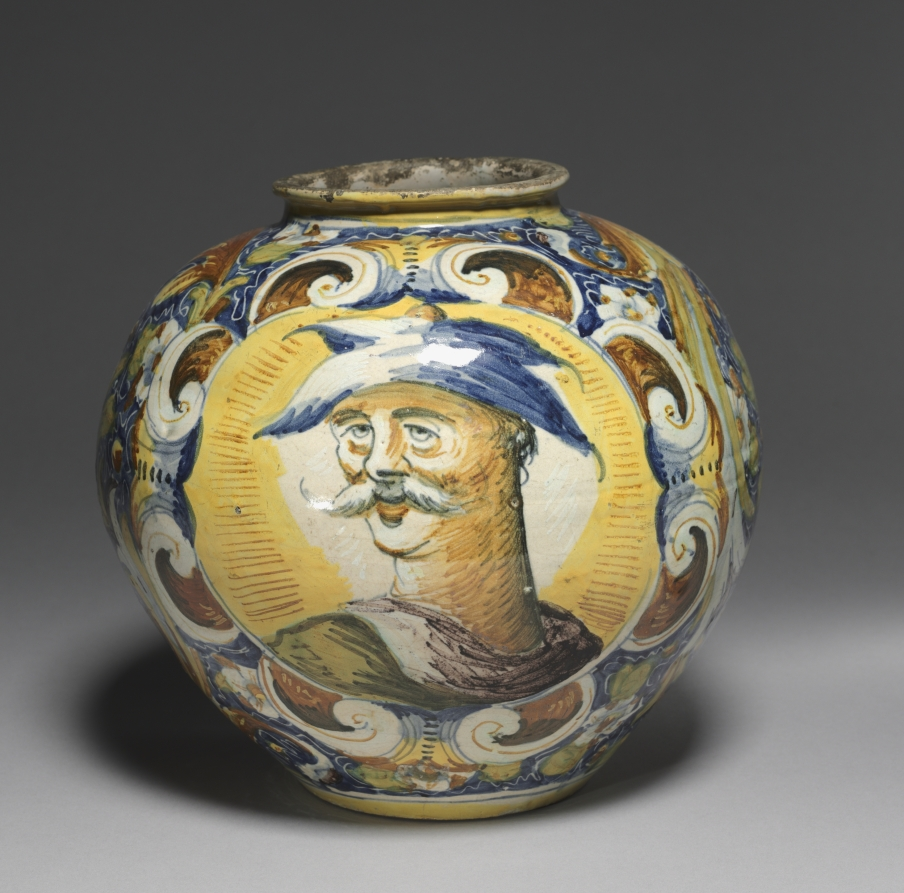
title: Storage Jar (Vaso a Palla)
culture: Italy, Venice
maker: circle of Domenego da Venezia (Italian)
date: c. 1560–80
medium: tin-glazed earthenware (maiolica)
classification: Ceramic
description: During the Italian Renaissance of the 1400s and 1500s, nobles and merchants eager to express their wealth and sophistication ordered ceramics for dining, display, and storage. Known as maiolica, because it resembled the brightly colored ceramics from the Mediterranean island of Majorca, these ceramic vessels were covered with a tin glaze that provided an opaque white surface on which colorful decoration could be painted.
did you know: In contrast to a pharmacy jar, this Vaso a Palla (globular or round-shaped jar), likely served a more domestic function and may have held oil or preserved fruits and nuts.